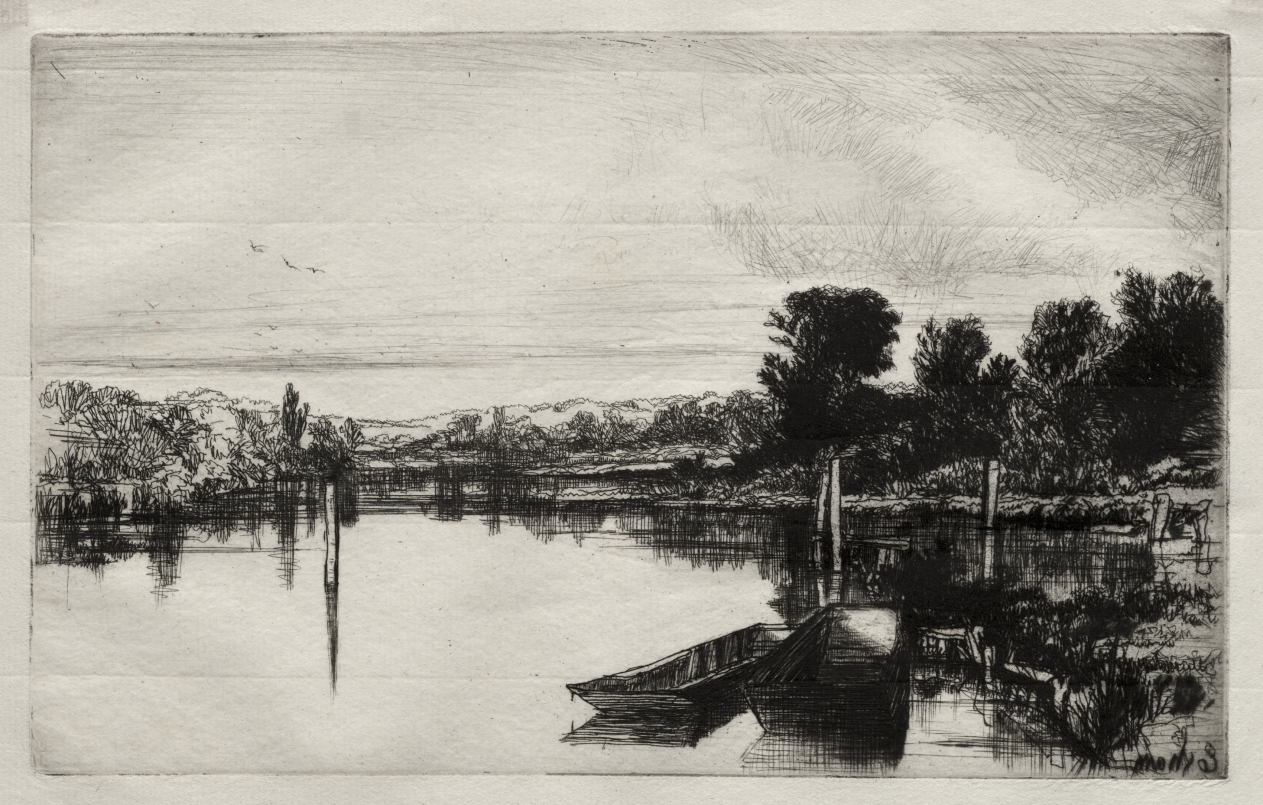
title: Egham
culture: England, 19th century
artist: Francis Seymour Haden (British, 1818–1910)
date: 1859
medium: etching and drypoint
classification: Print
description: Francis Seymour Haden worked professionally as a surgeon, experimenting avidly with etching in his spare time. He took up the medium while it was experiencing a major revival of interest in London, and he quickly developed an artistic reputation that outweighed his medical work. Most of Haden’s prints were landscapes. In this work, he cleanly wiped ink from the plate to suggest the sun’s bright light and reflection over the river.